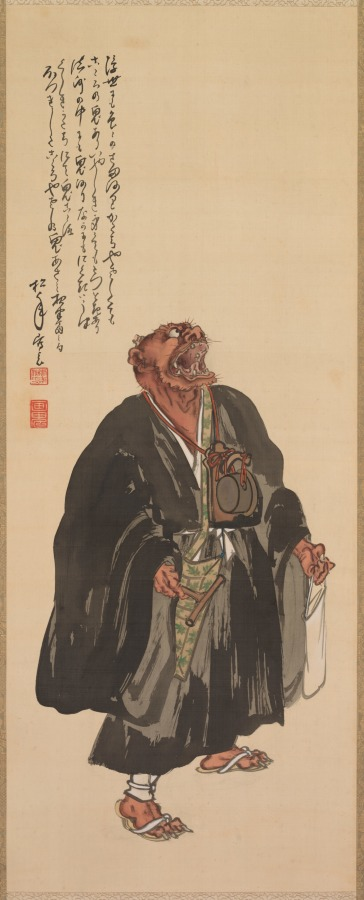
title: Demon Intoning the Name of the Buddha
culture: Japan, Meiji period (1868–1912)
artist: Suzuki Shōnen (Japanese, 1849–1918)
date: late 1800s–early 1900s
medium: hanging scroll; ink and color on silk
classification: Painting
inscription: artist's inscription, signature, and seal upper left.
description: Among the subjects of souvenir paintings made since the 1600s in Ōtsu, a travel hub near Kyoto in western Japan, was a demon in monk’s robes reciting the name of the Buddha Amida to the rhythm of his gong. Ōtsu paintings largely disappeared with the advent of rail travel in the late 1800s, as people no longer stopped in the area. In this work, Kyoto-based artist Suzuki Shōnen reimagined the demon for the modern era—the simple figure from the Ōtsu painting is transformed into a realistic one accompanied by a calligraphic meditation on its nature.